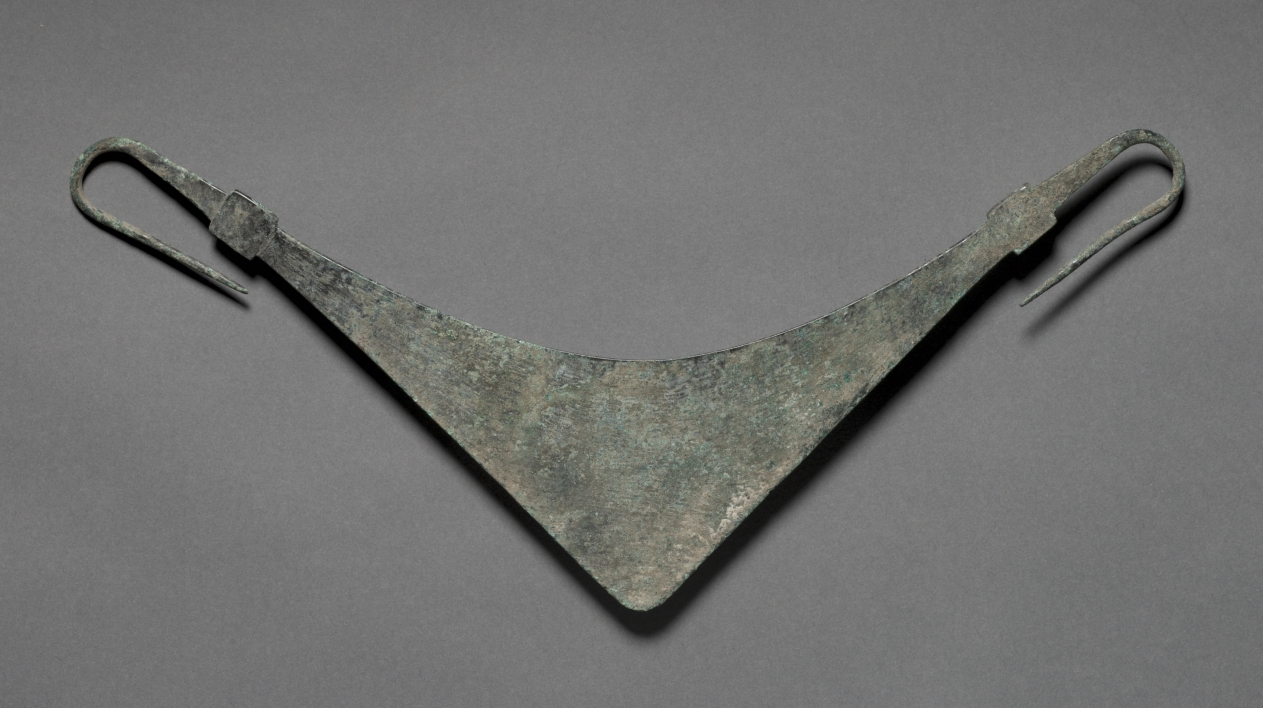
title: Woman's Belt Hanger (Zone)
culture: Greece, Geometric period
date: c. 725–675 BCE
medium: bronze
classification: Metalwork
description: The shape and punched and incised decoration of this northern Greek triangular-shaped zone (woman’s belt hanger) may symbolize a woman’s procreative anatomy, with groups of small circles flanking a large central radiating circle. An ornament of this type was found in a woman’s grave positioned directly over the pelvic bone, and could have been worn suspended from or attached to a belt made of less durable materials.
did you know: Ancient bronze objects often have a greenish hue due to a chemical reaction that creates this surface patina.